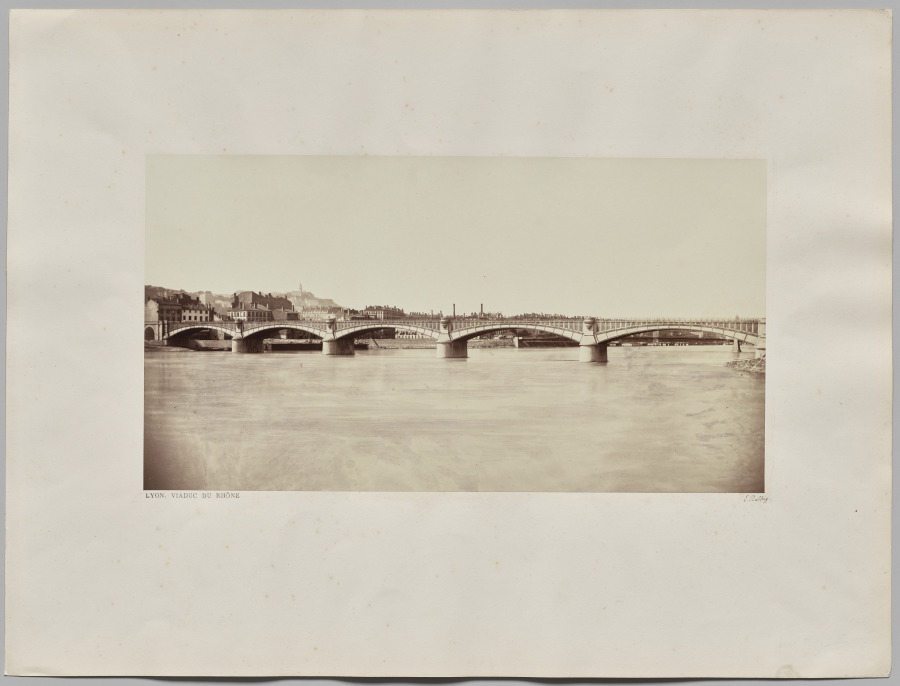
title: Lyon. Viaduc du Rhône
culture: France, 19th century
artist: Édouard Baldus (French, 1813–1889)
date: c. 1860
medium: albumen print from collodion negative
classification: Photograph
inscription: Imprinted in black ink on recto of mount: “LYON. VIADUC DU RHÔNE”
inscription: Written in black ink on recto of mount: “E. Baldus”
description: Edouard Baldus, one of the greatest French architectural photographers, documented many of the engineering projects and economic growth that accompanied the construction of the railroads in France. Bridges and viaducts were examples of advancing engineering technology and critical structures for commerce. In this view by Baldus, the viaduct’s repeating arches form a soothing rhythm suggestive of classical balance and symmetry at odds with its modern role.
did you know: This cast-iron railway bridge, completed in 1857, still carries trains today.